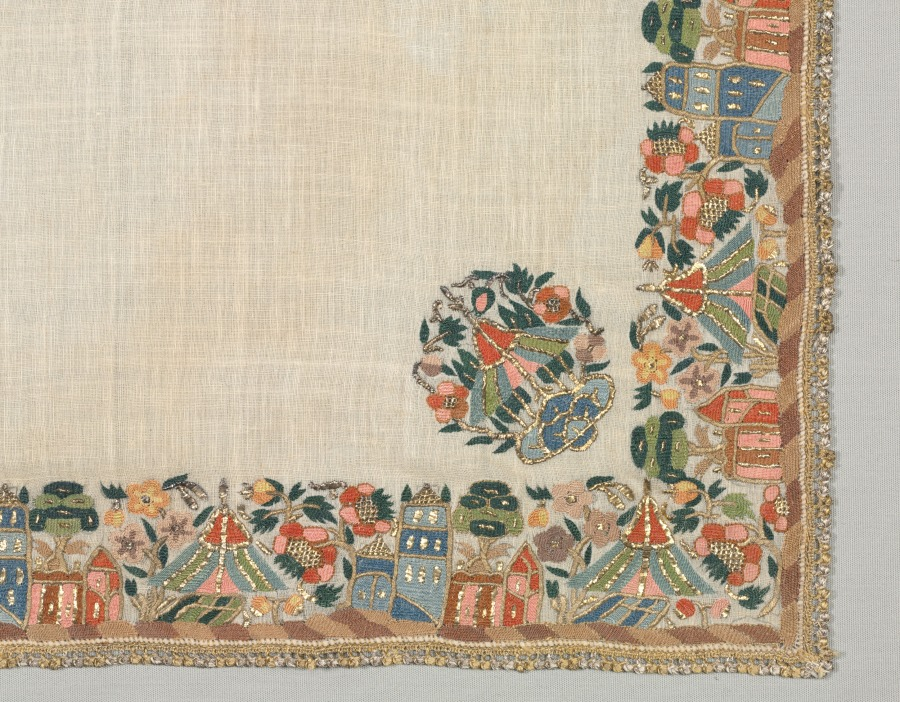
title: Embroidered head scarf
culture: Turkey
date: 1800s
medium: plain weave: linen; embroidery, double-running stitch: silk, gilt-metal strips and thread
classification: Embroidery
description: The edges of this headscarf are embroidered with landscape: a mosque alternates with a Turkish tent with a flowering plant between. In each corner is a medallion formed by a flowering plant surrounding a Turkish tent.